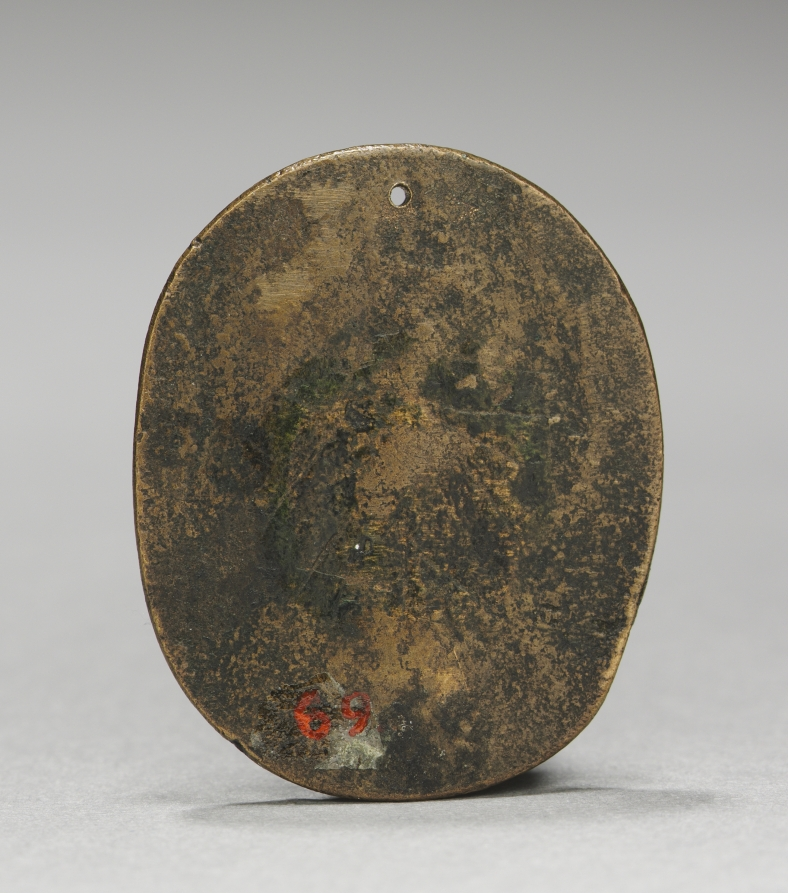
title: Apollo and Marsyas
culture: Italy, 15th century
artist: Cristoforo di Geremia (Italian, active 1456–76)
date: c. 1468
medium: bronze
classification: Sculpture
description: This plaquette is based on an important 1st-century gem attributed to Diskourides that passed into the Medici collection in the 1400s. The antique carnelian stone was so popular that the design was copied in numerous variations and media. In Ovid's Metamorphoses, Marsyas challenged Apollo to a music contest: his flute versus the god's lyre. As punishment for Marsyas's hubris, Apollo bound him to a tree and had his skin flayed. In the middle of the composition is the diminutive Olympus, Marsyas's student, begging Apollo for mercy. While the exact function of this plaquette is not clear, the subject had significance for political and noble figures in the Renaissance. The lyre symbolized peace, and thus the victory of Apollo's lyre stood for the triumph of universal harmony. When Pope Paul II Barbo (1417–1471) commissioned a portrait medal in 1468, the reverse included this same image, making the connection between his papacy and the new "Peace of Italy."